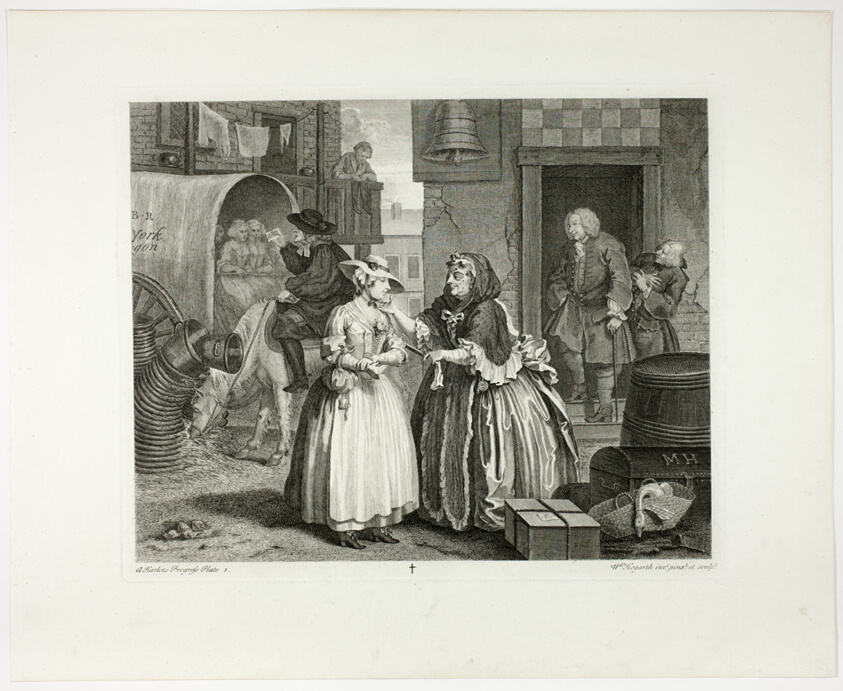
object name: Print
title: Plate one, from A Harlot's Progress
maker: William Hogarth (English, 1697-1764)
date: 1732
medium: Engraving in black on ivory laid paper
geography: England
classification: engraving; paper; print; prints and drawing